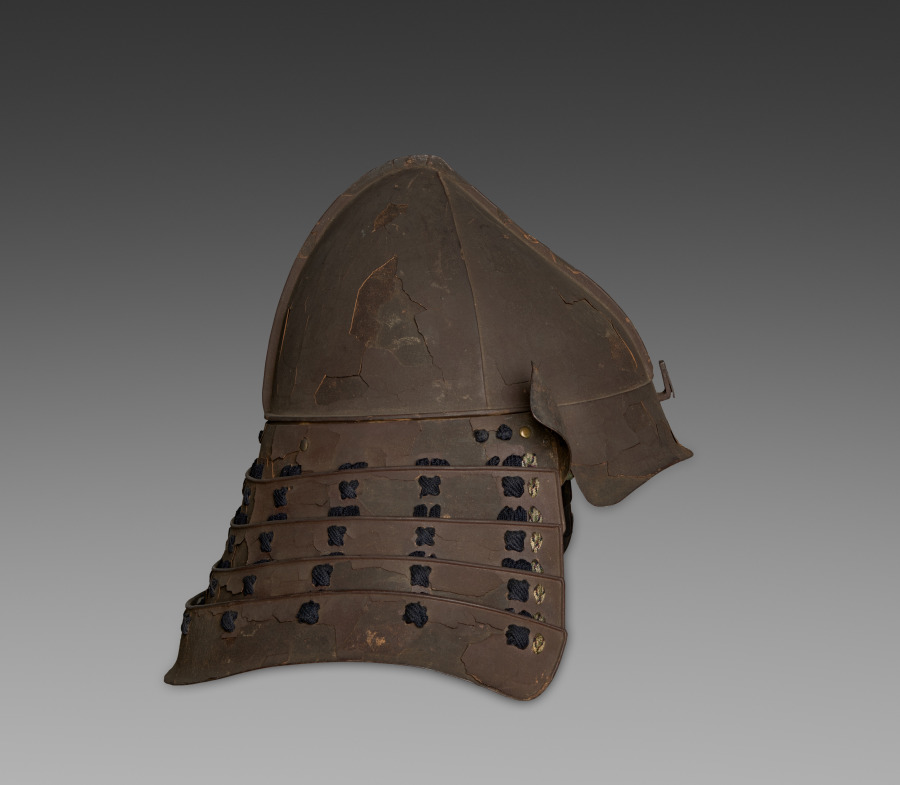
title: Helmet (Kabuto)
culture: Japan, Edo period (1615–1868)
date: 1615–1868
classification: Arms and Armor